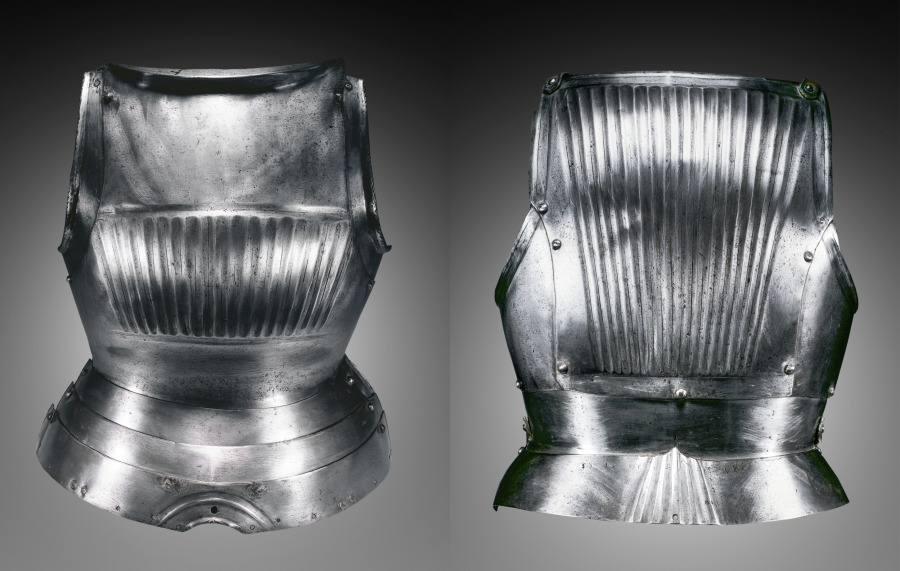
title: Breast and Backplates from a Maximilian Armor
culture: Germany, Nuremberg(?), early 16th century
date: c.1510–30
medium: steel, brass rivets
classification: Arms and Armor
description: Distinguished by its regularly fluted surfaces, armor in this style was popularized in South Germany during the early 1500s. The style is usually called "Maximilian," as it was introduced during the reign of Emperor Maximilian I (1493–1519). The style reflects male costume of the period and the shift to the new rounded forms of the Renaissance.